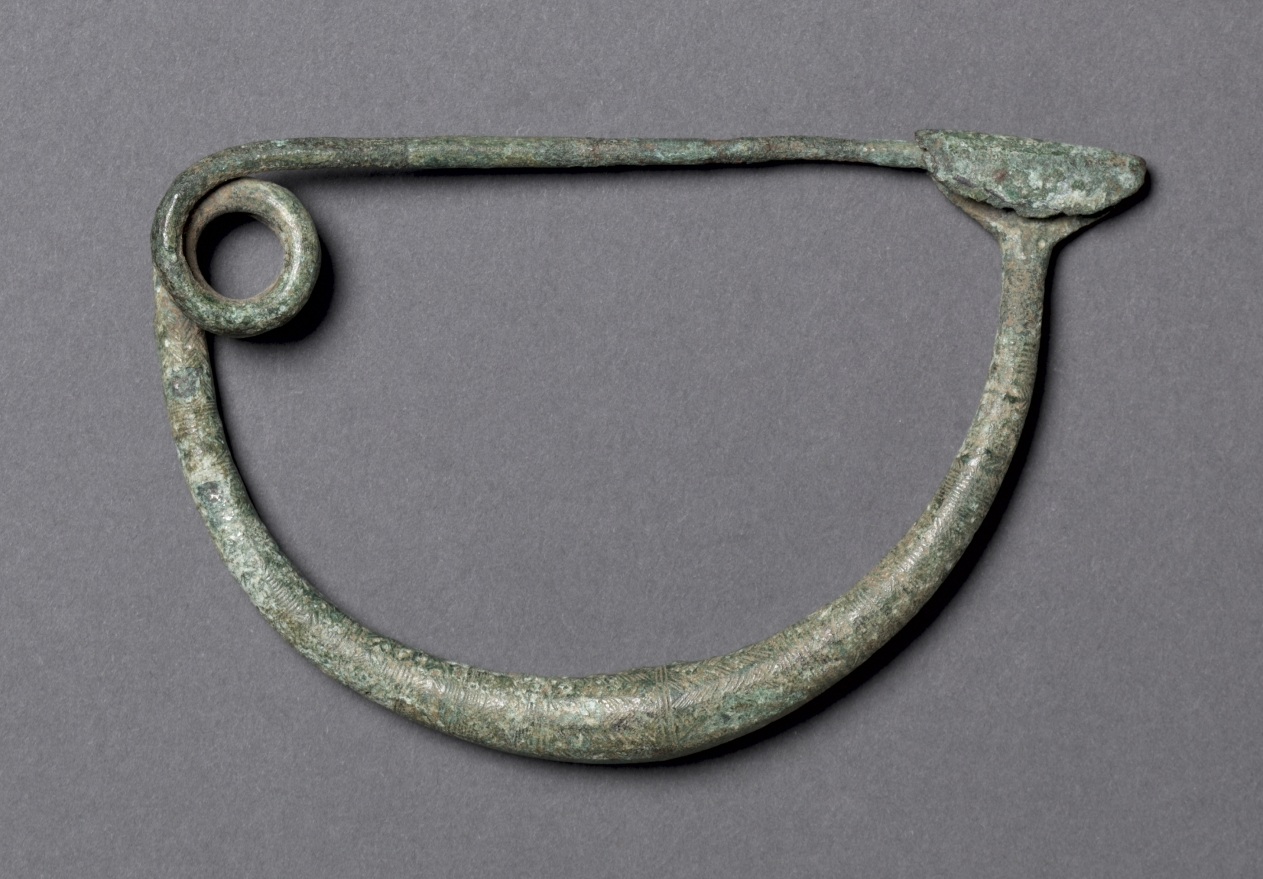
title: Boat-Shaped Fibula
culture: Italy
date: 900–800 BCE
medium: bronze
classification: Jewelry